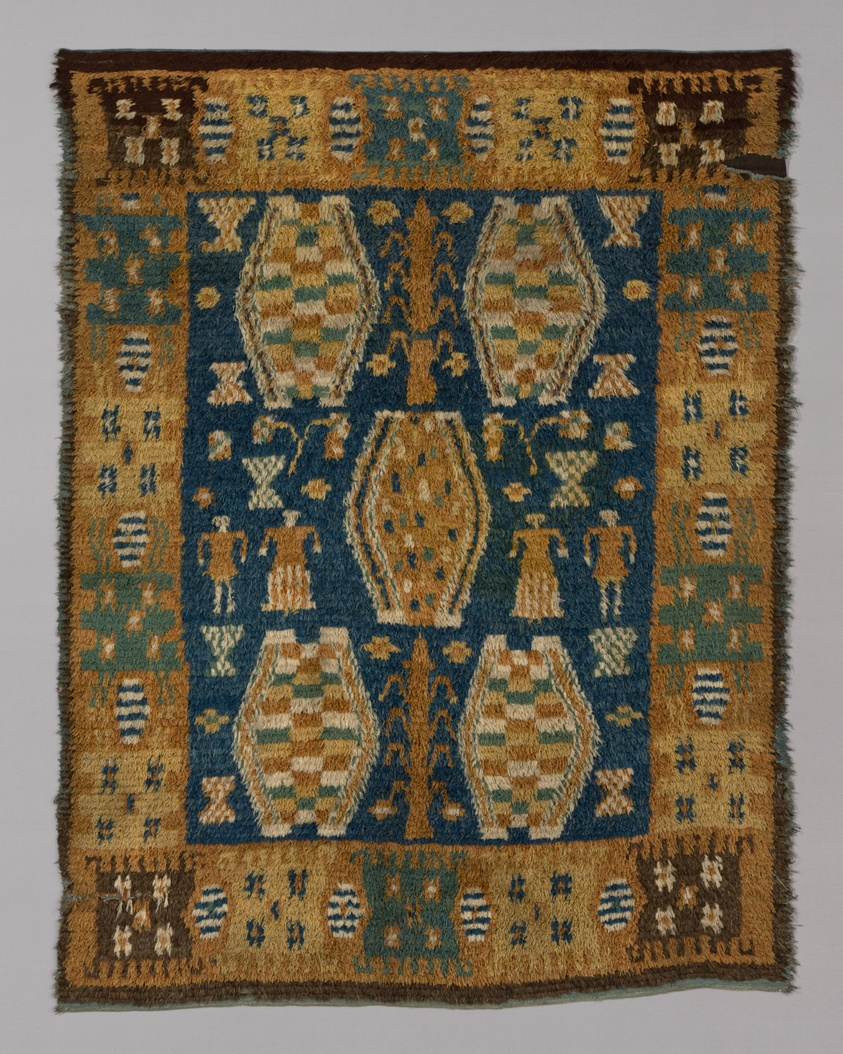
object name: Textile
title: Carpet (Known as a "Ryijy" or "Rya")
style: Folk Art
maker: Central Finland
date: 1701/25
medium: Wool, weft-faced warp-rib plain weave with supplementary wrapping wefts forming cut pile through a technique known as "Ghiordes knots"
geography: Finland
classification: textile; weaving - carpet; weaving